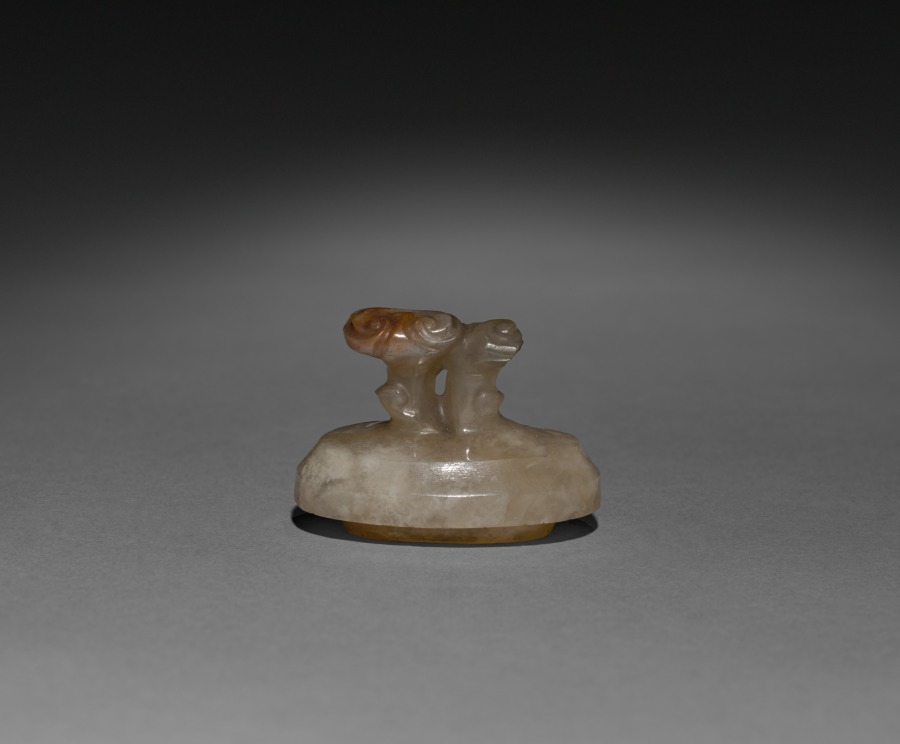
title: Vase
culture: China, Qing dynasty (1644-1911)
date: 1644–1911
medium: glass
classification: Glass